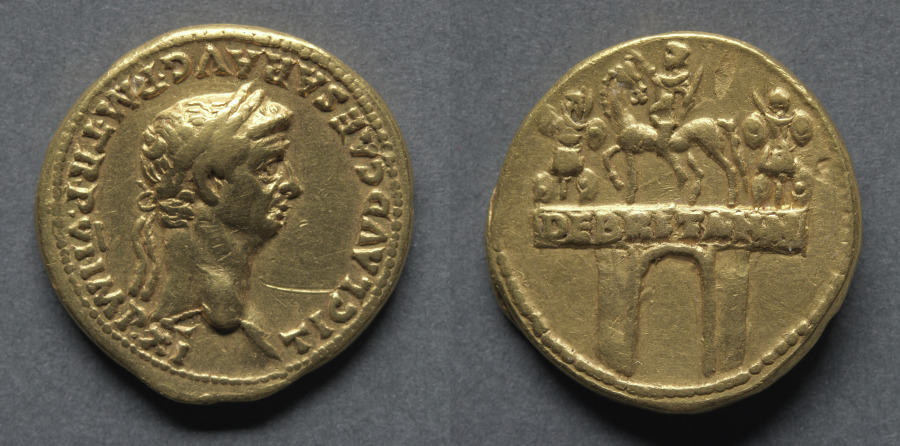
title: Aureus: Bust of Claudius I (obverse); Triumphal Arch with Equestrian Statue and Trophies (reverse)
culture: England, Roman, Claudius I (41–54 CE)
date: 47–48 CE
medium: gold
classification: Coins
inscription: TI. CLAVD. CAESAR. AVG. P. M. TR. P.. VI. IMP. XI.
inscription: De Britann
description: Minted in Rome, this coin depicts the triumphal arch erected there in 44 AD commemorating Claudius in the campaign in Britain. On top of the arch is the emperor seated on a horse between two military trophies. The arch itself was a converted aqueduct which crossed the main road leading north toward Rome. Claudius was the youngest of the three surviving children of Drusus and Antonia Minor and the first Roman emperor to have been born outside Rome.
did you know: During his reign, Claudius started the successful campaign for the conquest of Britain.